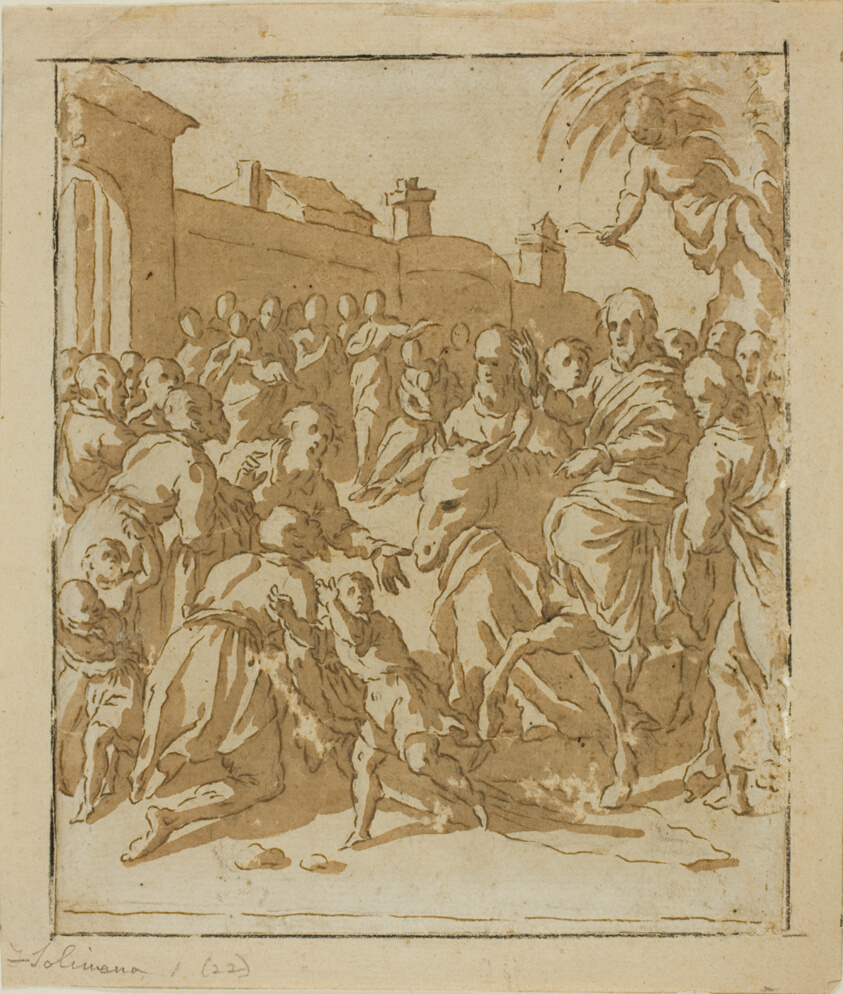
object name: Drawing and Watercolor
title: Christ Entering Jerusalem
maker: Marcantonio Bassetti (Italian, 1586-1630)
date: 1600/10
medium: Pen and brown ink with brush and brown wash, with traces of graphite, on ivory laid paper, laid down on buff laid paper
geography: Italy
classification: pen and ink drawings; drawings (visual works); prints and drawing